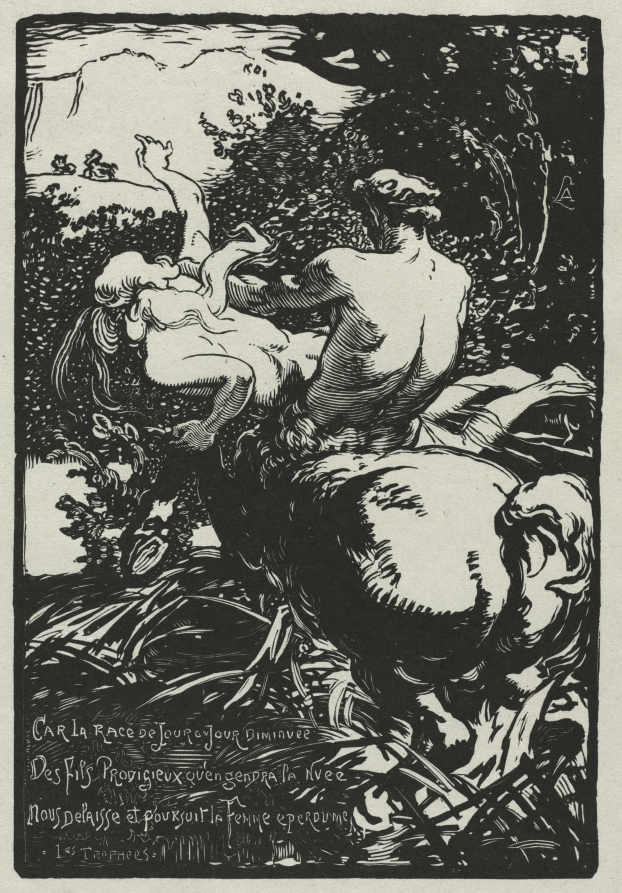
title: The Centaur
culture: France, 19th century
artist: Auguste Louis Lepère (French, 1849–1918)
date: 1896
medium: woodcut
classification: Print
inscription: inscribed: Car la Race De Jour en Jour Diminvee/ Des fils Prodigieux qu'en gendra pa Nvee/ Nous delaisse et pour suit la femme eperdume/ les trophees